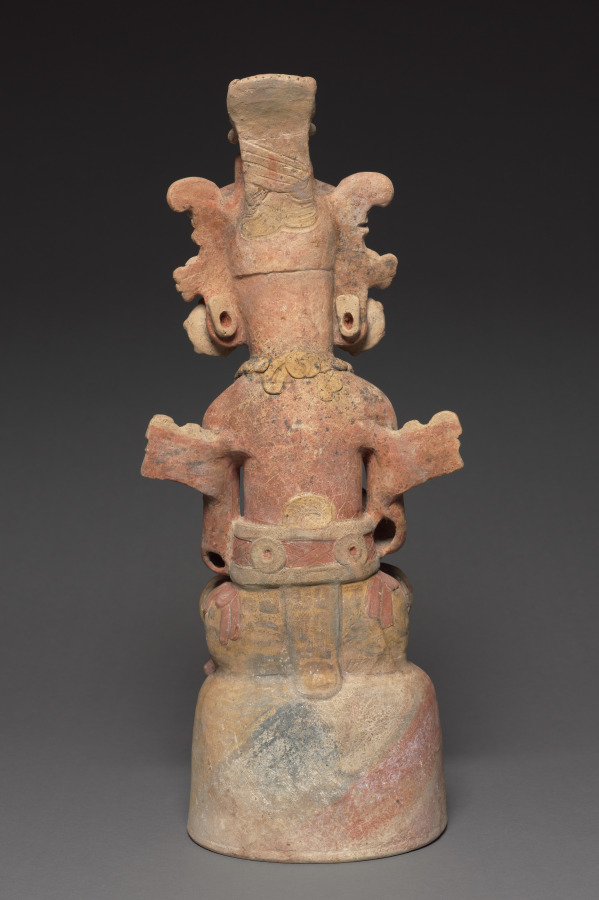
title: Artisan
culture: Guatemala, Petén region, Maya style (250-900), Maya style (250-900)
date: 250–600 CE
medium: earthenware with colored slips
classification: Sculpture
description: These figures represent the supernatural patrons of the visual arts and writing: the brothers Hun Batz and Hun Chuen ("One Monkey" and "One Artisan"). The two were refined artists but also bullies who tormented their younger brothers, who took revenge by transforming their elders into monkeys. Many Maya representations of the painter-scribes immortalize this fate by depicting the pair with both simian and human features, as here. The brothers are shown engaged in artistic or scribal pursuits. Sitting on high-domed bases that may have served as the lids of incense or offering bowls, each apparently once grasped a tool in his upper hand—for instance, a paint brush or a stylus for writing. In the lower hand, one cradles a small mask and the other, a piece of bark that likely refers to the beaten bark from which the Maya made books.